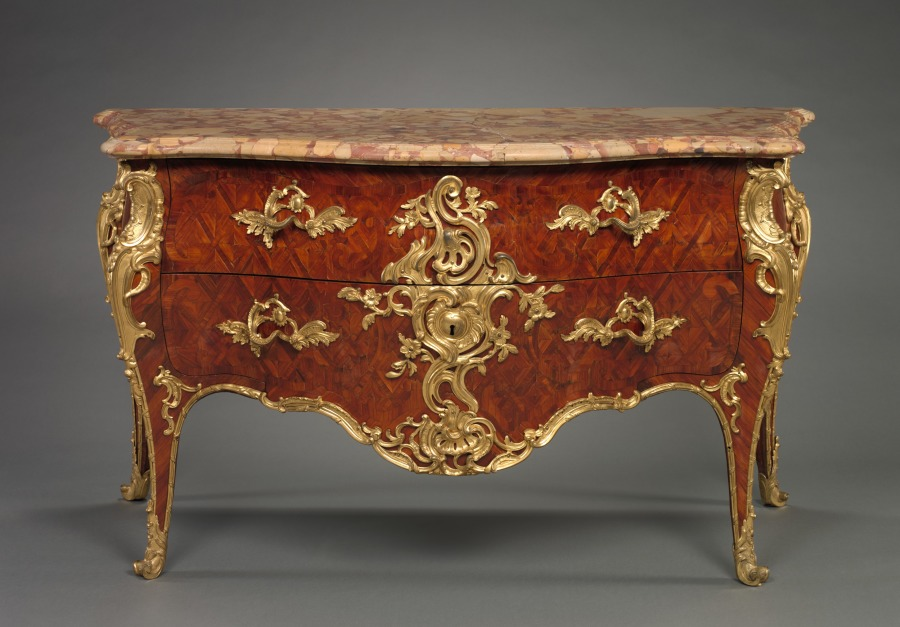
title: Chest of Drawers (Commode)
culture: France, Paris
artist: Jean-Pierre Latz (French, 1691–1754)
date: c. 1750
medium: oak, tulipwood marquetry, gilt metal mounts, marble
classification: Furniture and woodwork